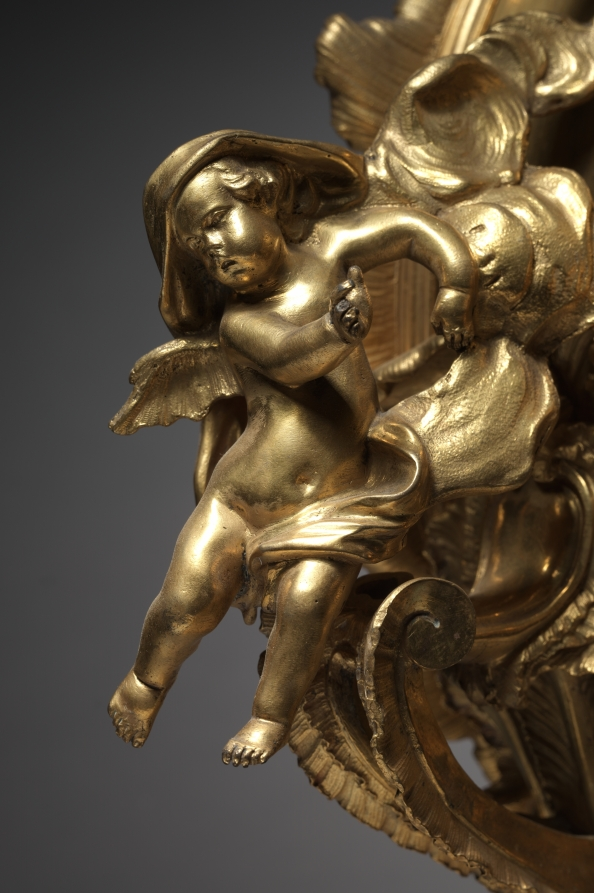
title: Clock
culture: France, 18th century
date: c. 1750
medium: gilt bronze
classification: Furniture and woodwork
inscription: on clock face: JOUARD A PARIS; engraved on plaque attached to back of clock face: Jouard Paris.